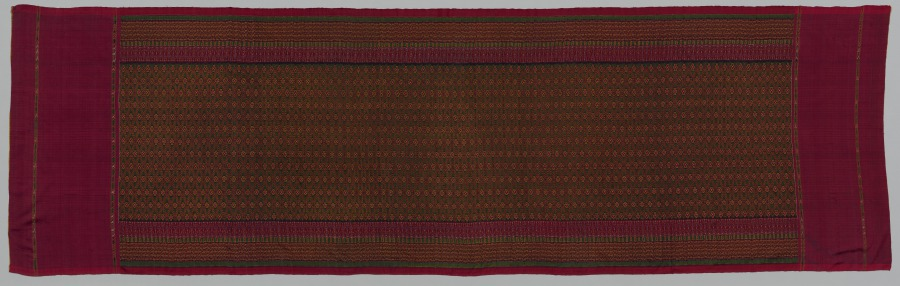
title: Silk "Sampot" (Loin Cloth)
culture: Cambodia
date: early 1900s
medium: Silk: tabby weave, weft ikat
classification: Textile